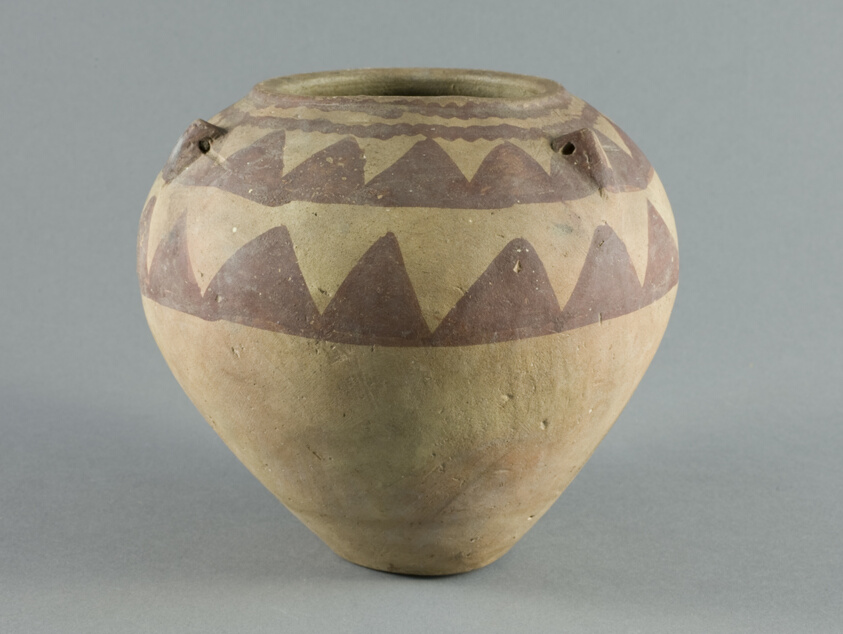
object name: Vessel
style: predynastic, egyptian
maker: Egyptian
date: Predynastic Period, Naqada II (about 3800–3300 BCE)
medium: Ceramic and pigment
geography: Egypt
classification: vessel; ceramics; ancient art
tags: vessels